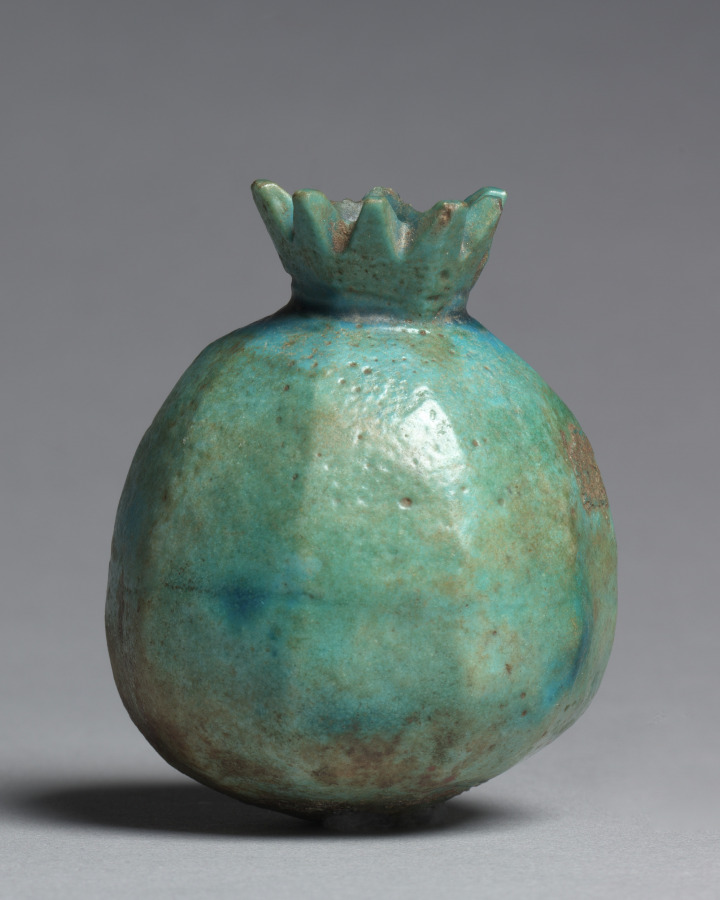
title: Pomegranate Vase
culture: Egypt, New Kingdom (1540–1069 BCE), Dynasty 18, reign of Tuthmosis III (1479–1425 BCE) or later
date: 1479–1425 BCE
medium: blue vitreous faience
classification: Vessels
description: This small, round-bottomed flask takes the shape of a pomegranate. The serrated petals or calyxes that trim the top mimic the turned-back outer husk that is characteristic of this fruit. The flask's aperture is small. Not native to Egypt, the pomegranate (Punica granatum) was introduced from western Asia or Cyprus in the first half of Dynasty 18, probably between the reigns of Amenhotep I and Tuthmosis III. The fruit's novelty, as well as its shape, most likely accounts for its tremendous popularity as a deluxe vessel form at this time. Perhaps best known in Egypt and abroad in the materials of faience and glass, the type also occurs in metal, wood, and stone.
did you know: The small size of the flask, together with its narrow opening, suggests that it originally contained a small amount of precious liquid, perhaps an ancient perfume or an offering of pomegranate wine.